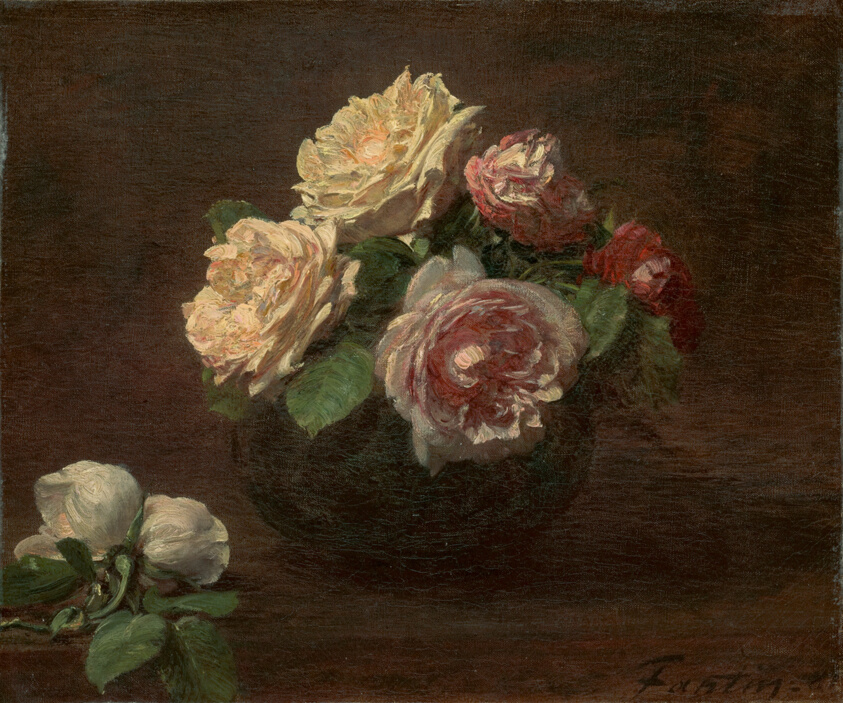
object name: Painting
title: Roses in a Bowl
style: Impressionism, 19th century, nineteenth century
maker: Henri Fantin-Latour (French, 1836–1904)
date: 1881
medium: Oil on canvas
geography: France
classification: oil on canvas; france; french; oil paintings (visual works); paint; still life; painting; european painting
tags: still life, France, French, red (color), pink (color), white (color), roses, bowl, flowers